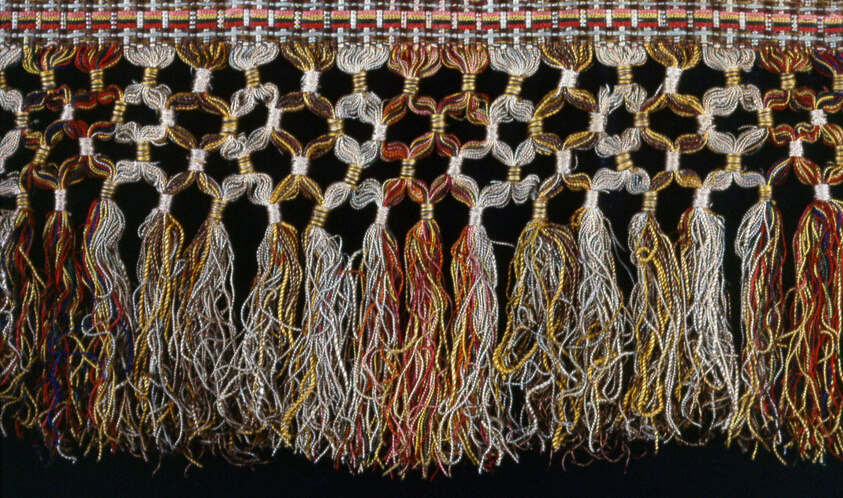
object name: Textile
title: Fringe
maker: France or Italy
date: 17th/18th century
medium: Silk and gold gilt strip wound around a silk fiber core, plain weave with supplementary patterning warps and extended ground weft cut fringe, grouped and wrapped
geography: France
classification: textile; weaving